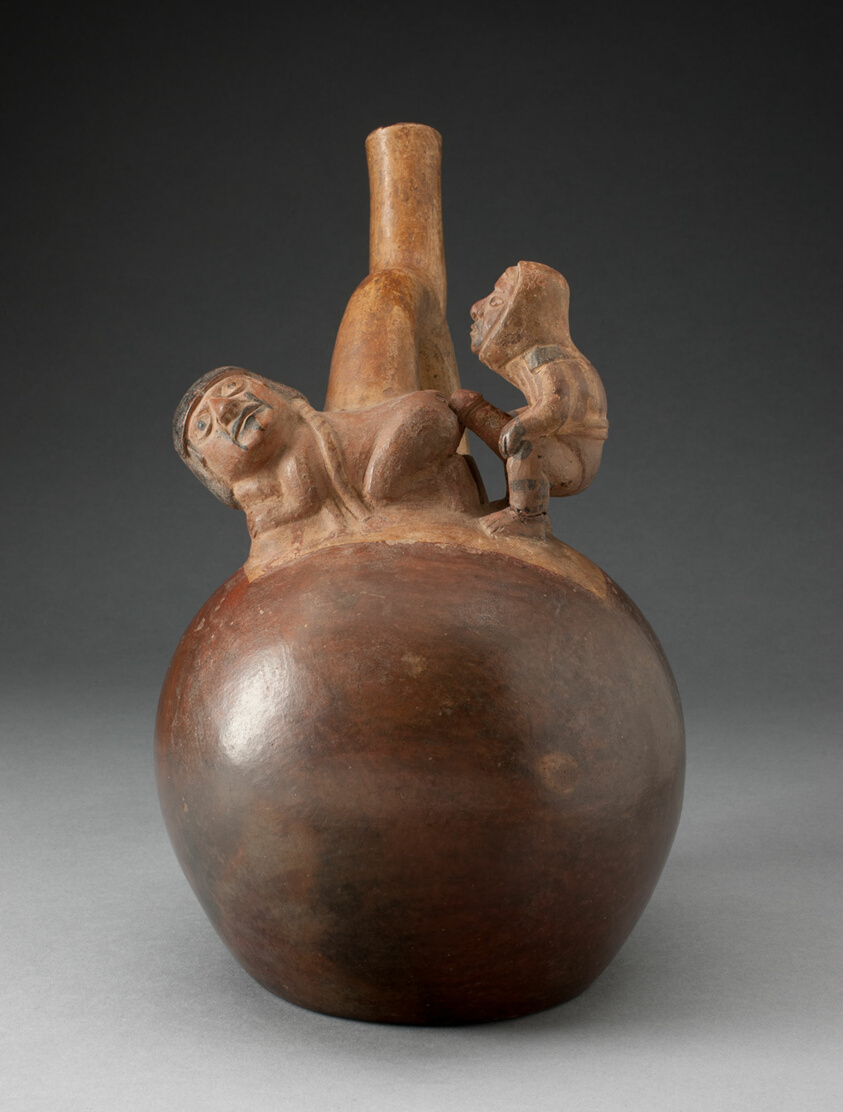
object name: Vessel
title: Handle Spout Vessel Depicting an Erotic Scene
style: moche, mochica, early intermediate period, Pre-Columbian, americas, Arts of the Americas, andean, andes, south american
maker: Moche (North coast, Peru)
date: 100 BCE–500 CE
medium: Ceramic and pigment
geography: Peruvian North Coast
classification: earthenware; ceramics; vessel; art of the americas